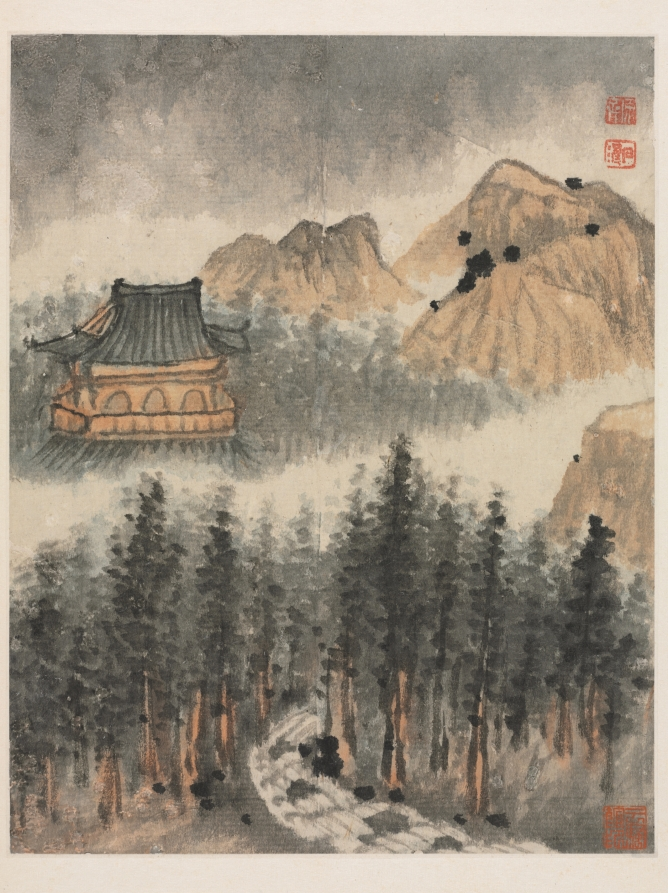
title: Reminiscences of Qinhuai River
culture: China, Qing dynasty (1644-1911)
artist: Shitao (Chinese, 1642–1707)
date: 1642–1707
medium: album leaf, ink and color on Song paper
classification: Painting